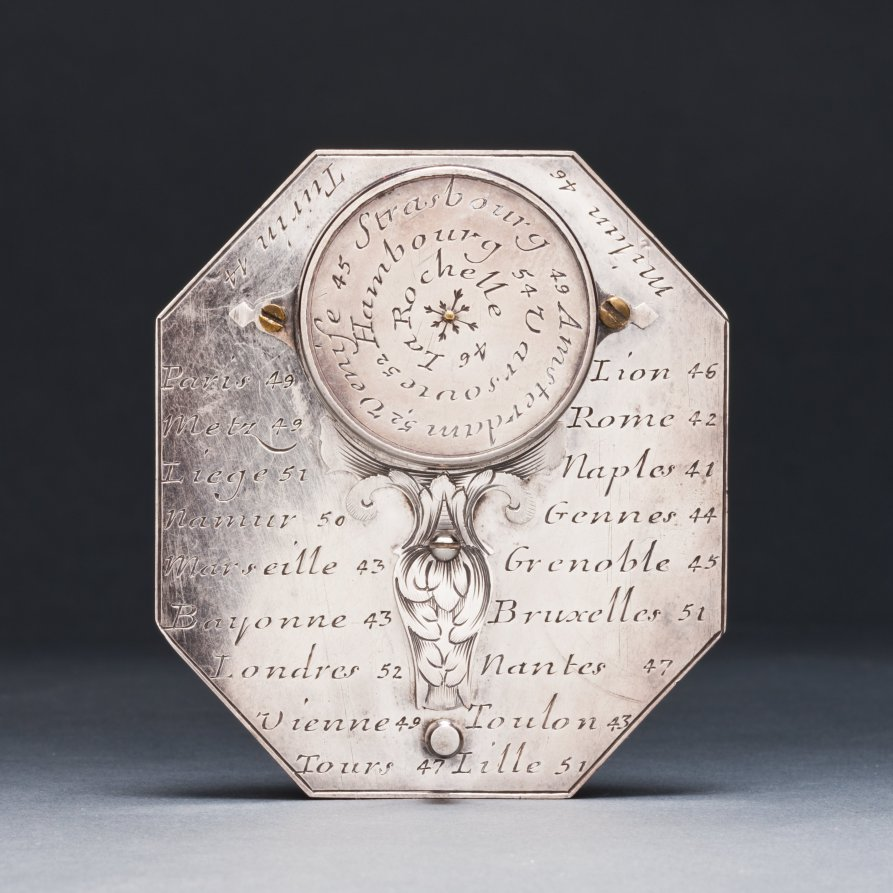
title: Butterfield Sundial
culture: France, 18th century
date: 1700s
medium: silver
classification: Silver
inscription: [Engraved signature above the compass in ribbon band]: "N. BION A Paris"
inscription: [Engraved on the face of the sundial]: “Pour 55° 4-5-6-7-8-9-10-11 50° IIII-V-VI-VII-VIII-IX-X-XI 45° 5-6-7-8-9-10-11 40° -VI-VII-VIII-IX-X-XI'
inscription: [Engraved on the other side]: "Pour 55° -8-7-6-5-4-3-2-1-0 50°-VIII-VII-VI-V-IIII-III-II-I 45°-8-7-6-5-4-3-2-1 40°-VII-VI-V-IIII-III-II-I"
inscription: [Engraved around the compass]: “NORD-OUEST-SUD-EST”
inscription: [Engraved on the back of the sundial]: “Turin 44 Milan 46 Paris 49 Lion 46 Metz 49 Rome 42 Liege 51 Naples 44 Namur 50 Gennes 44 Marseille 43 Grenoble 45 Bayonne 43 Bruxelle 51 Londres 52 Nantes 47 Vienne 48 Toulon 43 Tours 47 Lille 51”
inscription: [Engraved around the back of the compass]: “Venise 45 Strasbourg 49 Amsterdam 52 Hambourg 54 Varsovie 52 La Rochelle 46”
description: Butterfield-type sundials are characterized by their adjustable gnomons, metal flaps that cast a shadow on the dial’s face to indicate the hour, and geographical indices. This sundial has a scale adjustable between latitudes of 40° to 60° north. The latitudes of 26 European towns are engraved on its back for quick reference. With an intricately engraved silver face, it would have functioned as a fashionable traveler’s accessory.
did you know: Butterfield-style sundials were named after Micheal Butterfield, an English scientific and mathematical instrument maker who worked in Paris between 1674 and 1724.